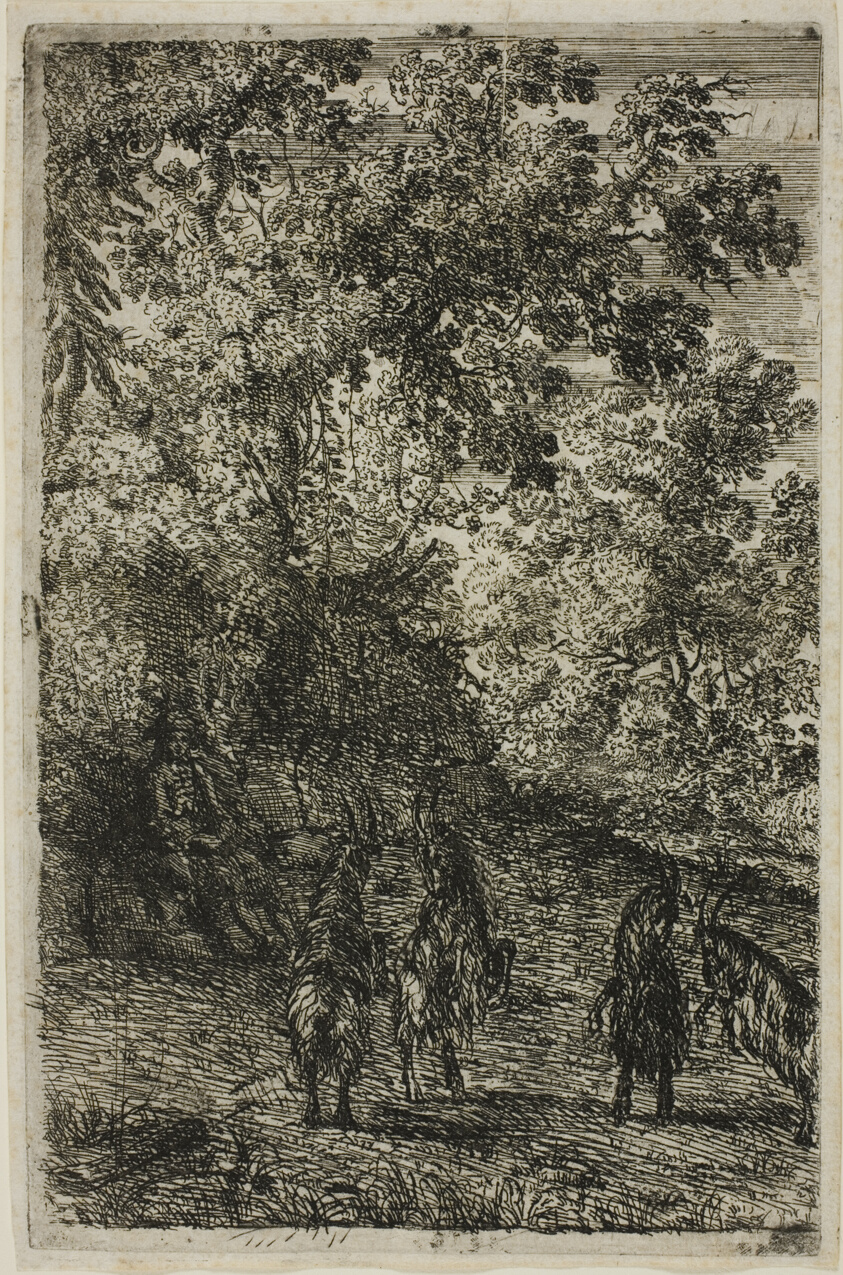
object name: Print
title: The Four Goats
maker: Claude Lorrain (French, 1600-1682)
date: 1630/33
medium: Etching on ivory laid paper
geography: France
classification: etching; print; prints and drawing